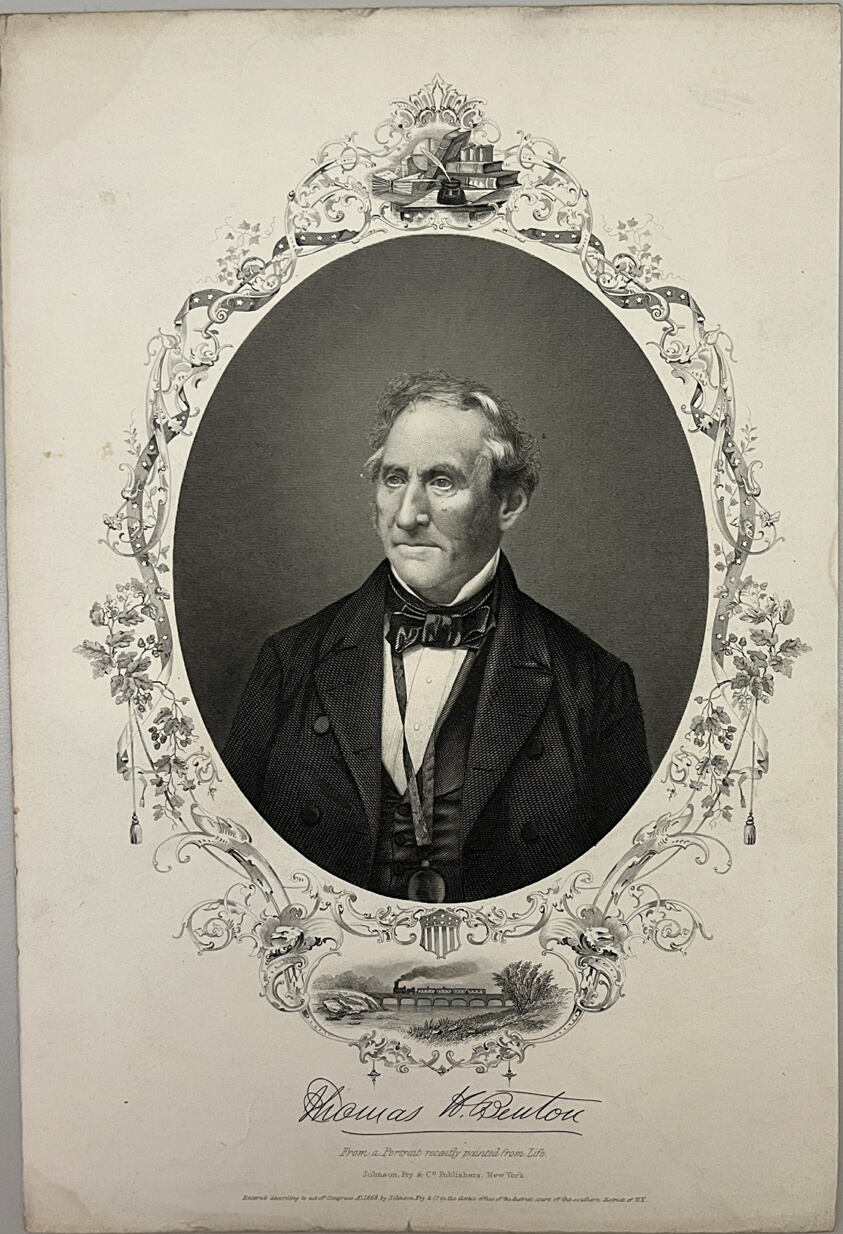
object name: Print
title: Thomas N. Beutou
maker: Artist Unknown (Likely American, 19th century); published by Johnson, Fry & Co (American, 19th century); after Artist Unknown (Likely American, 19th century)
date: 1858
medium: Etching on paper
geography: United States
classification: reproduction; print; prints and drawing